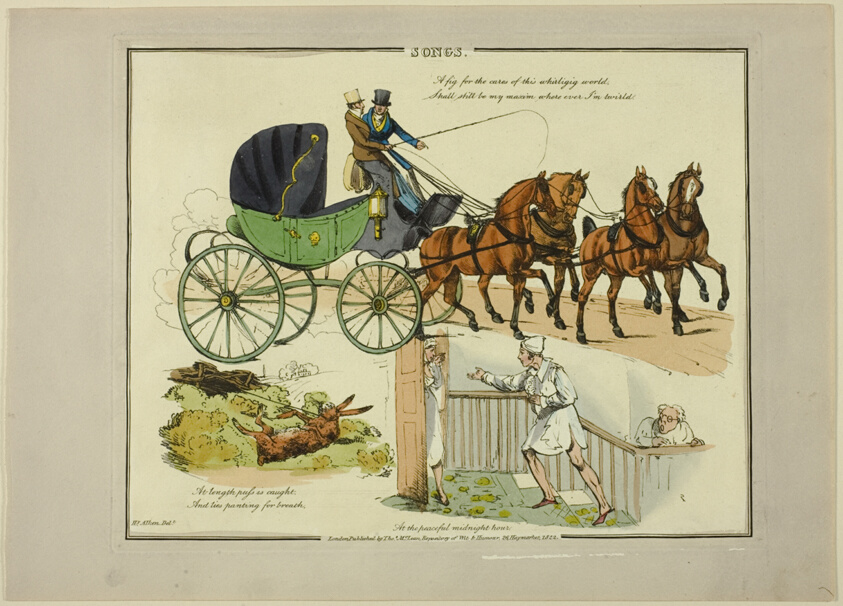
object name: Print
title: Plate from Illustrations to Popular Songs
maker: Henry Alken (English, 1785-1851); published by Thomas McLean (English, active 1790-1860)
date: 1822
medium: Soft ground etching with hand-coloring and aquatint on paper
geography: England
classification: etching; print; prints and drawing